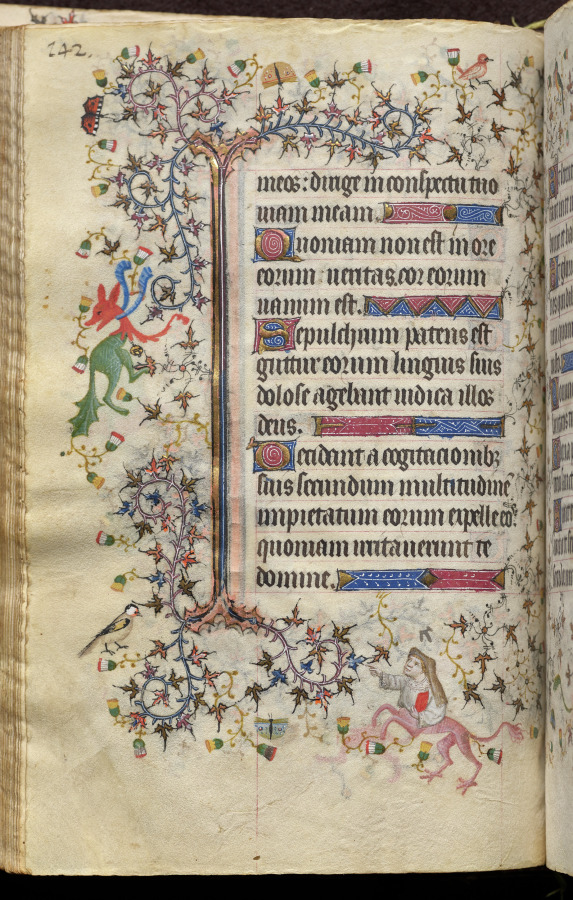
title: Hours of Charles the Noble, King of Navarre (1361-1425): fol. 71v, Text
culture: France, Paris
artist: Master of the Brussels Initials and Associates (French)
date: c. 1405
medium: ink, tempera, and gold on vellum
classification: Bound Volume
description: This precious volume was obviously highly prized by its owner, the French-born King of Navarre, who had his coat of arms painted on no less than twenty folios. Rather than directly commissioning this manuscript from a specific workshop, it seems that Charles the Noble acquired his book of hours -- perhaps ready-made for the luxury market -- while on a trip to Paris in 1404-05. A collaborative effort, six painting styles are evidenced within the pages of this codex, those of two Italians, two Frenchmen, and two Netherlanders. The painter who was responsible for the planning and decoration of the book, and who produced seventeen of the large miniatures, was a Bolognese artist known as the Master of the Brussels Initials. His principal assistant, responsible for most of the borders, was a Florentine who signed his name "Zecho" da Firenze on folio 208 verso.